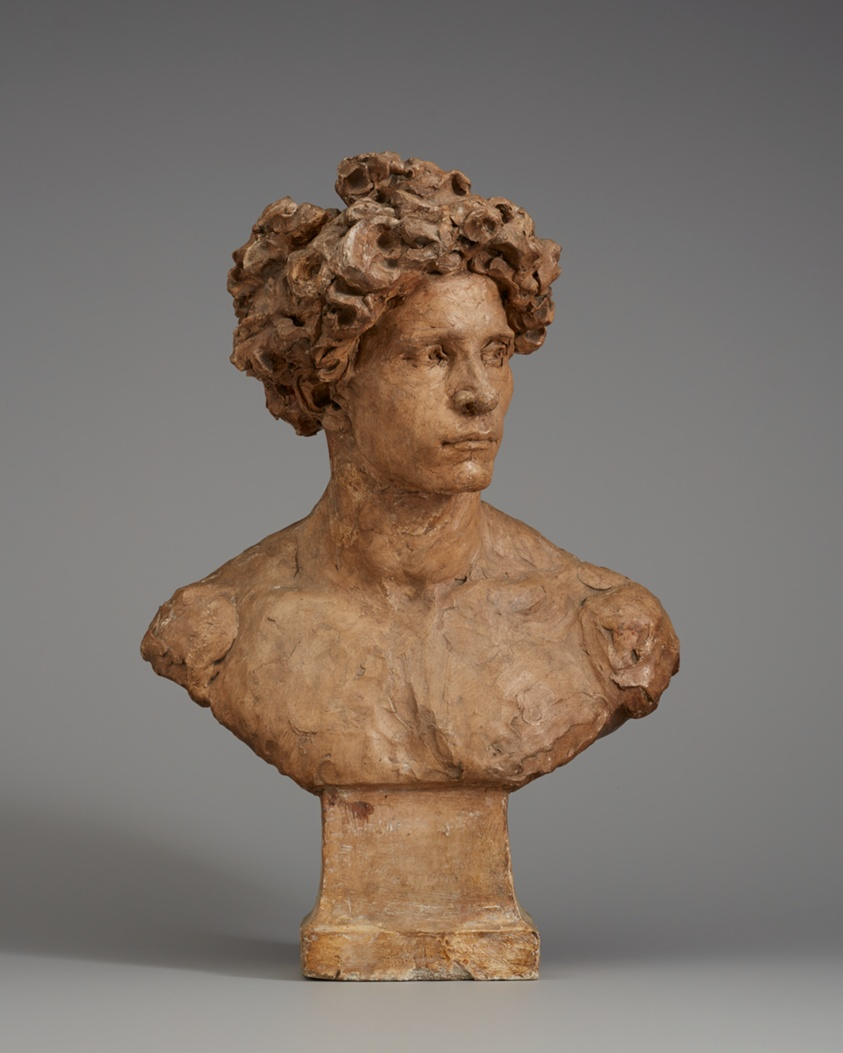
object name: Sculpture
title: Bust of a Young Man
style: nineteenth century, 19th century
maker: Aimé-Jules Dalou (French, 1838–1902)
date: 1877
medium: Patinated plaster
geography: France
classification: bust/head; sculpture; french; plaster; portrait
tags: portrait, portraits, portraits: male subject, man, busts, head